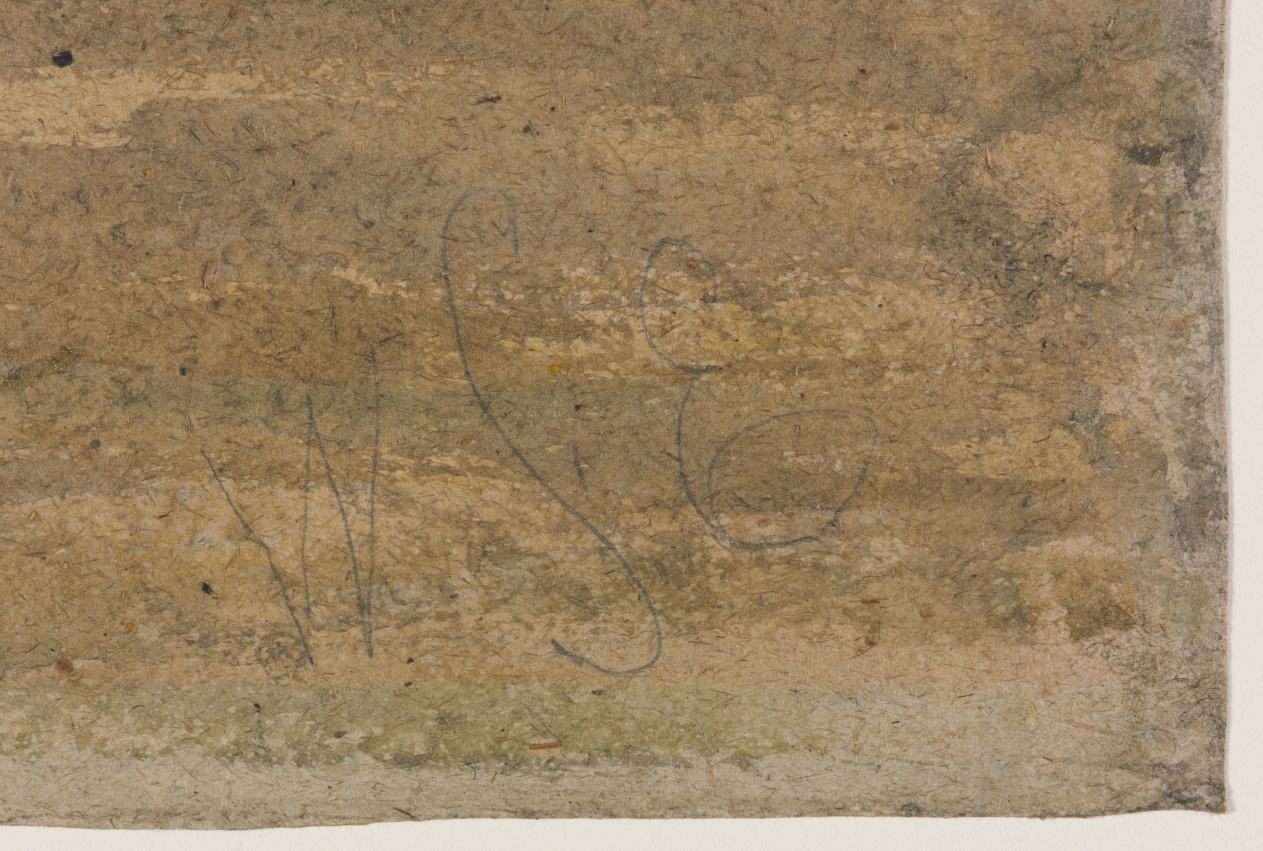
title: Bolton Abbey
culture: England, 19th century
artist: David Cox (British, 1783–1859)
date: c. late 1840s-1857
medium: watercolor with black chalk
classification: Drawing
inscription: inscribed, at lower right, in graphite: WSE; in white chalk on wood backing: June 8-03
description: This moody, broadly painted watercolor on rough, brown paper is emblematic of David Cox’s late style. Velvety grays and greens throughout the composition shift almost imperceptibly and streaks of blue wash, describing the distant hills and sky, are pierced by a sliver of brilliant yellow at the horizon. The ruined 12th-century priory is relegated to the background, nearly lost in the twilight.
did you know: The neighborhood where Bolton Abbey was found was one of David Cox's favorite places to paint and the church appeared as a subject throughout his works from about 1828 through 1857.